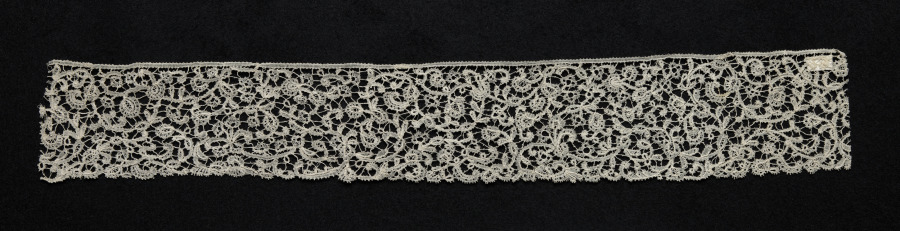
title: Lace Edging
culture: Belgium, Brussels or Bruges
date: 1800s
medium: Linen: bobbin lace (Duchesse lace)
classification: Lace